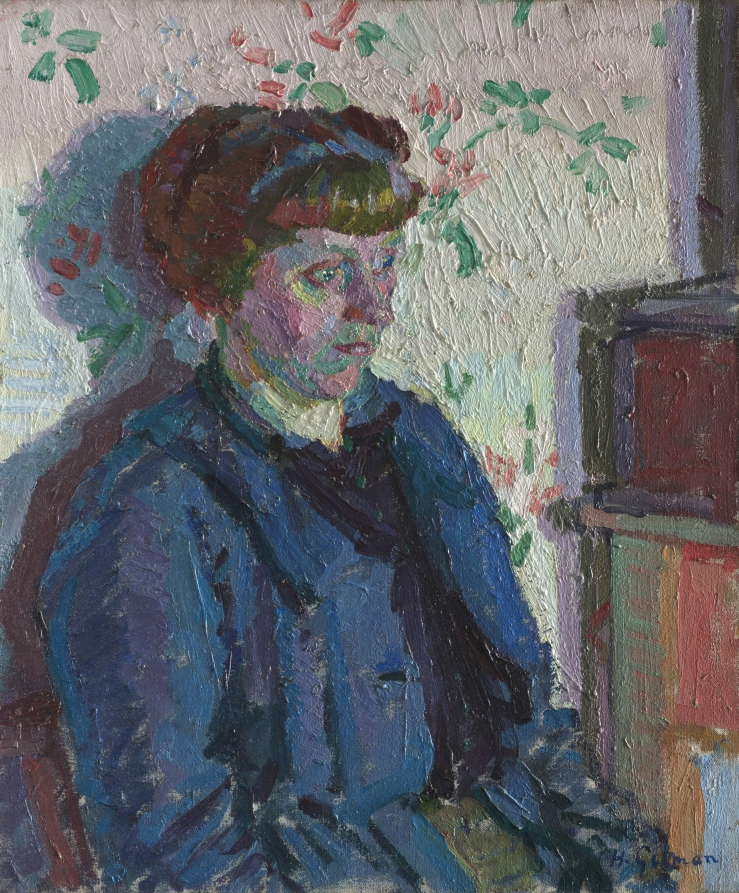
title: Sylvia Gosse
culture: England, 20th century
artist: Harold Gilman (British, 1876–1919)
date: c. 1913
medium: oil on canvas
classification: Painting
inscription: signed lower right: H. Gilman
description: Sylvia Gosse, the sitter for this painting by British artist Harold Gilman, was also an artist, specializing in etching. She was also known for being somewhat introverted. Does she seem to reveal any of her personality in this portrait?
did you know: Gilman discovered his passion for art after a major fall led to a hip injury that left the young artist-to-be confined to his bed where he began to sketch.